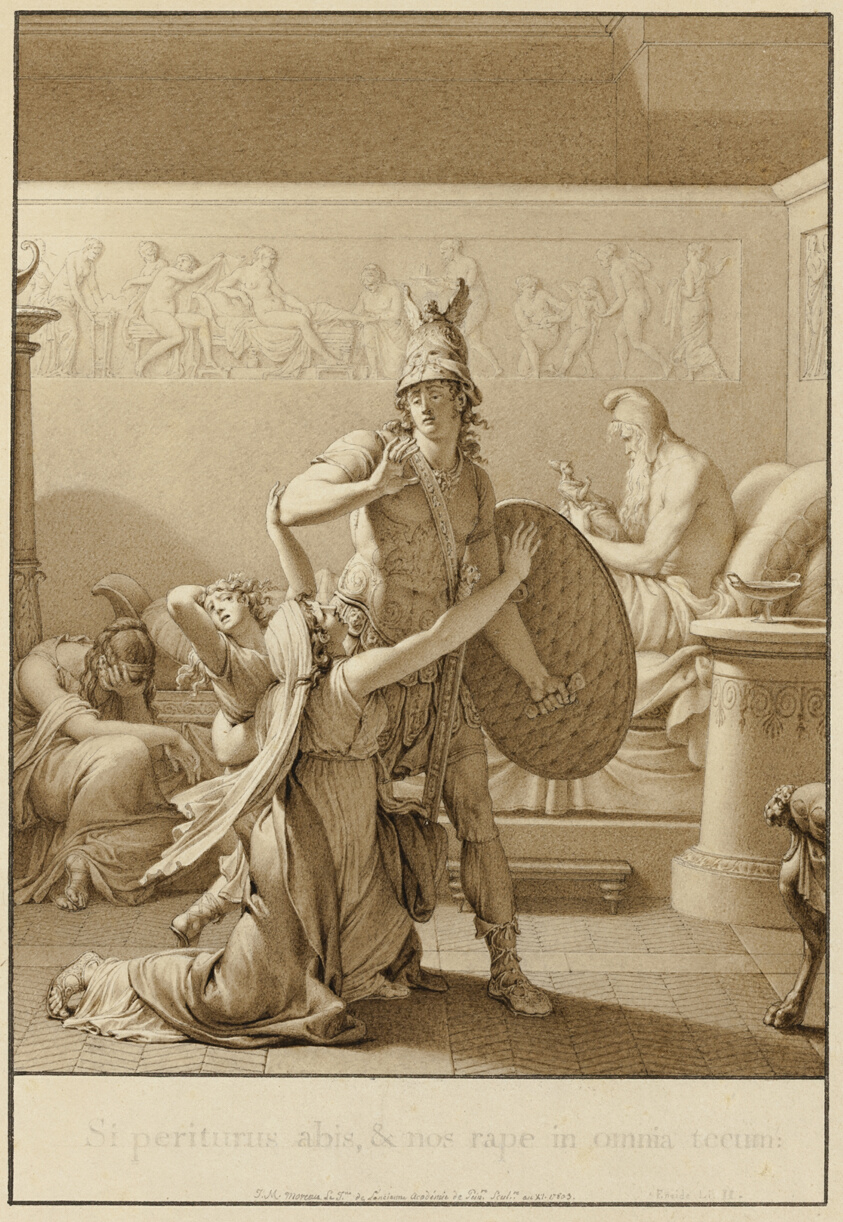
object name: Drawing and Watercolor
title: Creusa Pleads with Aeneas as He Leaves for War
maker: Jean Michel Moreau (French, 1741-1814)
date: 1803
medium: Pen and brown ink, brush and brown wash, on cream wove paper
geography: France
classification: pen and ink drawings; prints and drawing; drawings (visual works)